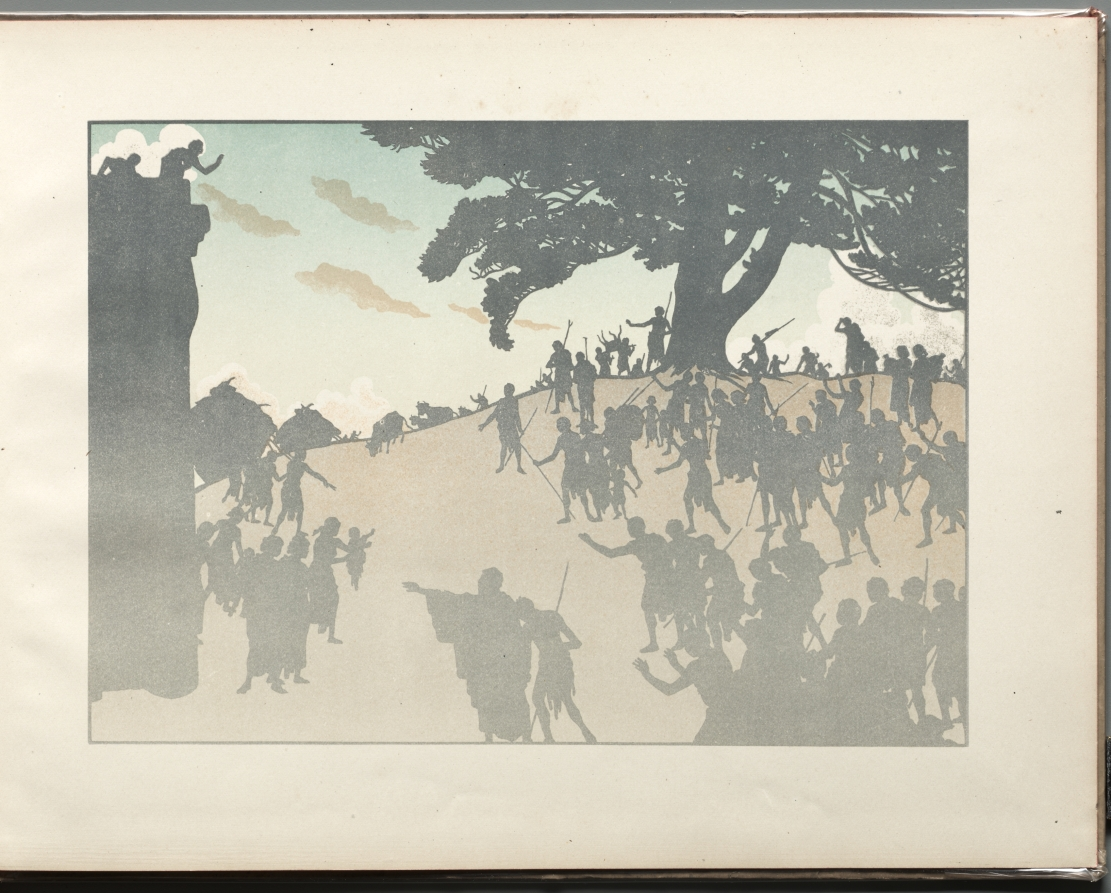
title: The Prodigal Son: page 43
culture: France, 19th century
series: Bound Volume illustrating the poetry and music of Georges Fragerolle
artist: Henri Rivière (French, 1864–1951)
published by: E. Flammarion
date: 1895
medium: 15 color lithographs in a bound volume illustrating the poetry and music of Georges Fragerolle: color lithograph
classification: Bound Volume